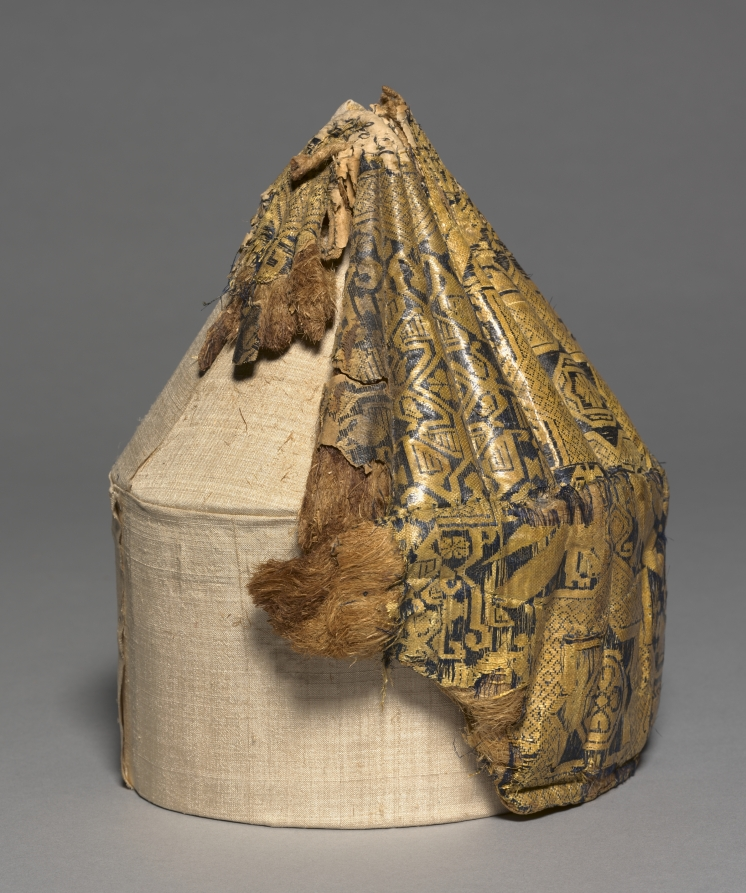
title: Quilted cap with star-patterned silk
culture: Iran or Iraq, Buyid or Seljuq period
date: 1000s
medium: lampas: silk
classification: Textile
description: This quilted hat is one of a number of hats that have been recovered from Egyptian graves. It consists of silk sewn to a heavily quilted form, the top part of which is ribbed. The design of the silk is based on an eight-pointed star with paired birds above and stylized palmettes in the interspaces. Such hats were worn with or without a turban by persons of ranks.